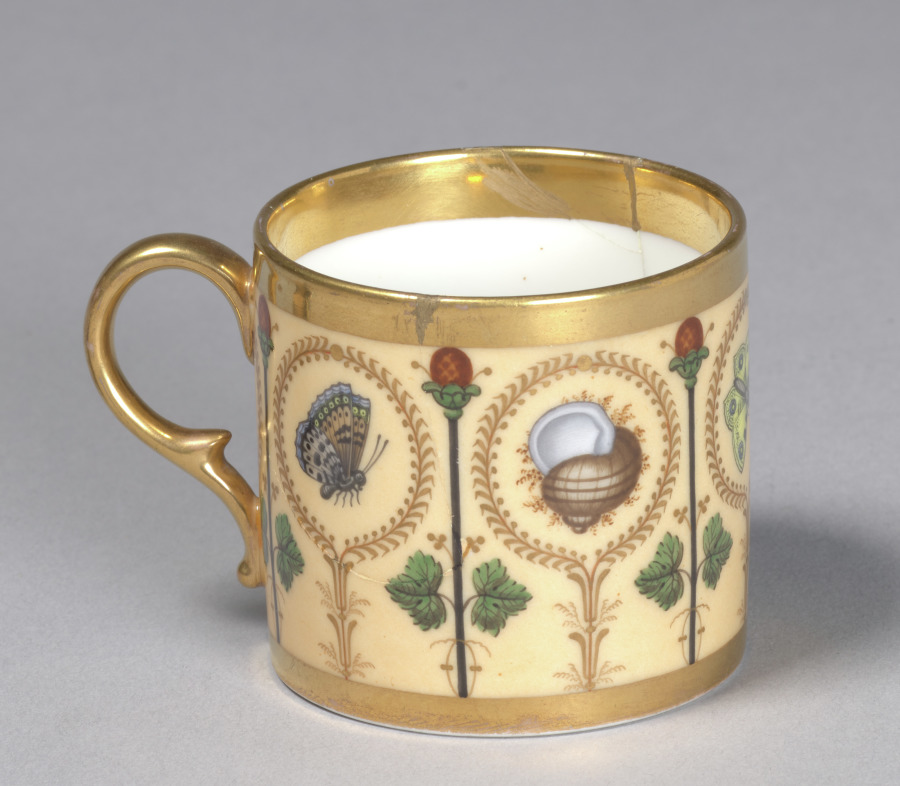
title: Cup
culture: France, 19th century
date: c. 1800–1810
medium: porcelain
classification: Ceramic